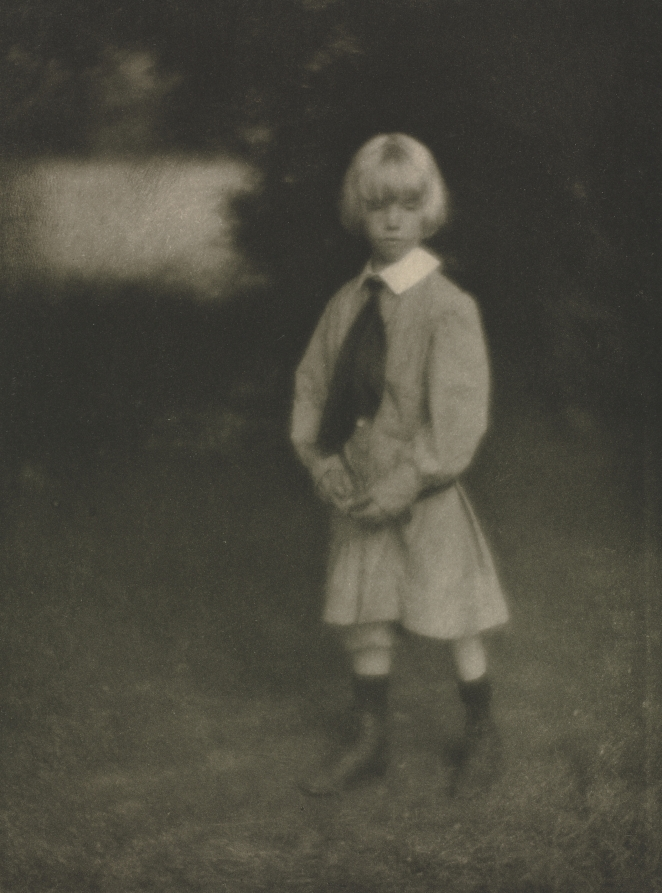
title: Camera Work: Portrait - Master Tom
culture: America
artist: Clarence H. White (American, 1871–1925)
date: 1908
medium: photogravure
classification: Bound Volume